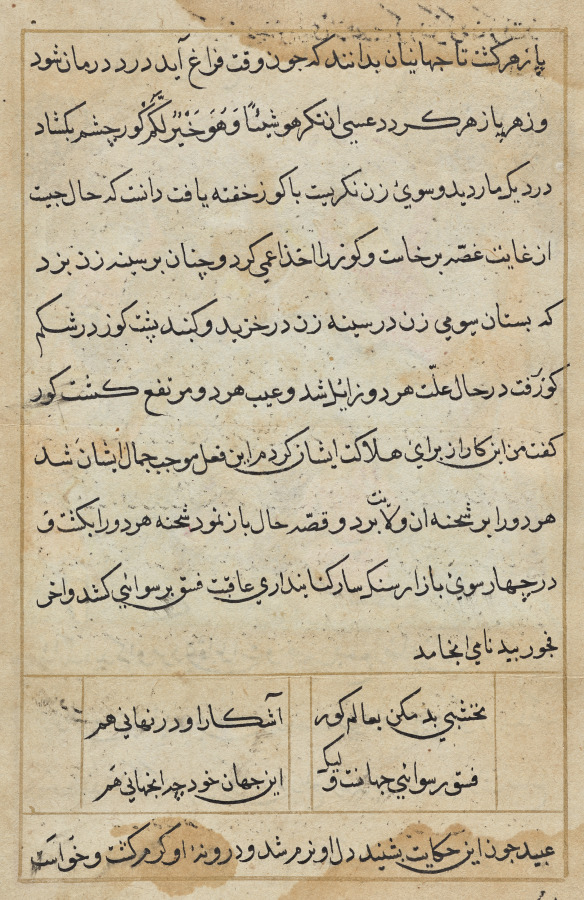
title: Page from Tales of a Parrot (Tuti-nama): text page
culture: Mughal India, court of Akbar (reigned 1556–1605)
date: c. 1560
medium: gum tempera, ink, and gold on paper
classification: Painting